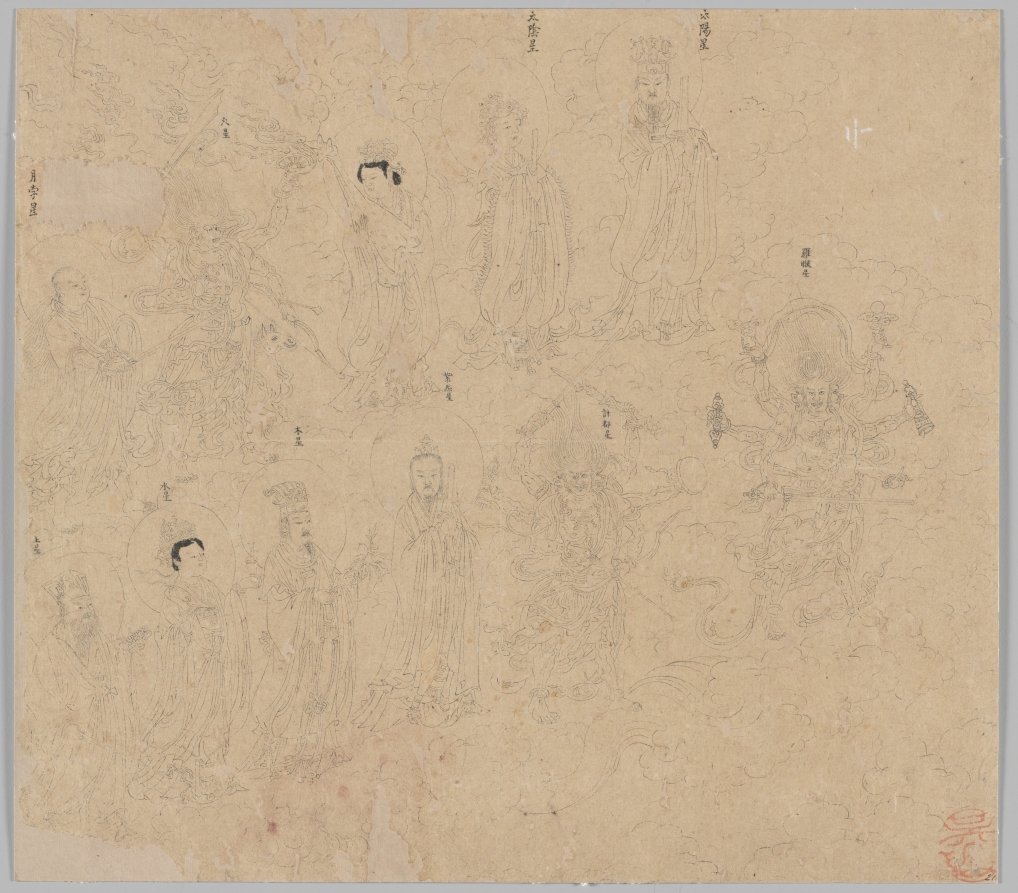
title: Album of Daoist and Buddhist Themes: Procession of Daoist Deities: Leaf 21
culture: China, Southern Song dynasty (1127-1279)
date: 1200s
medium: album, ink on paper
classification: Painting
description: This leaf is part of an important album of 50 drawings encompassing three subjects: processions of Daoist deities to the celestial spheres, the Ten Kings of Hell, and Erlang’s Campaign to Rid Mount Guankou of Dangerous Beasts (soushan tu 搜山圖). This leaf belongs to a group of drawings of deities of the Daoist pantheon that inspired Chinese Buddhist iconography in many instances. Here we see the personified Nine Brilliant Constellations (Jiu yao 九曜). From right to left in the upper row are the sun and moon followed by three other stars: Venus as a goddess, Mars, and Yuebei. Proceeding in the lower row from right to left are Luohou, the comet Jidu, Ziqu, Jupiter, Mercury depicted as a female, and Saturn.